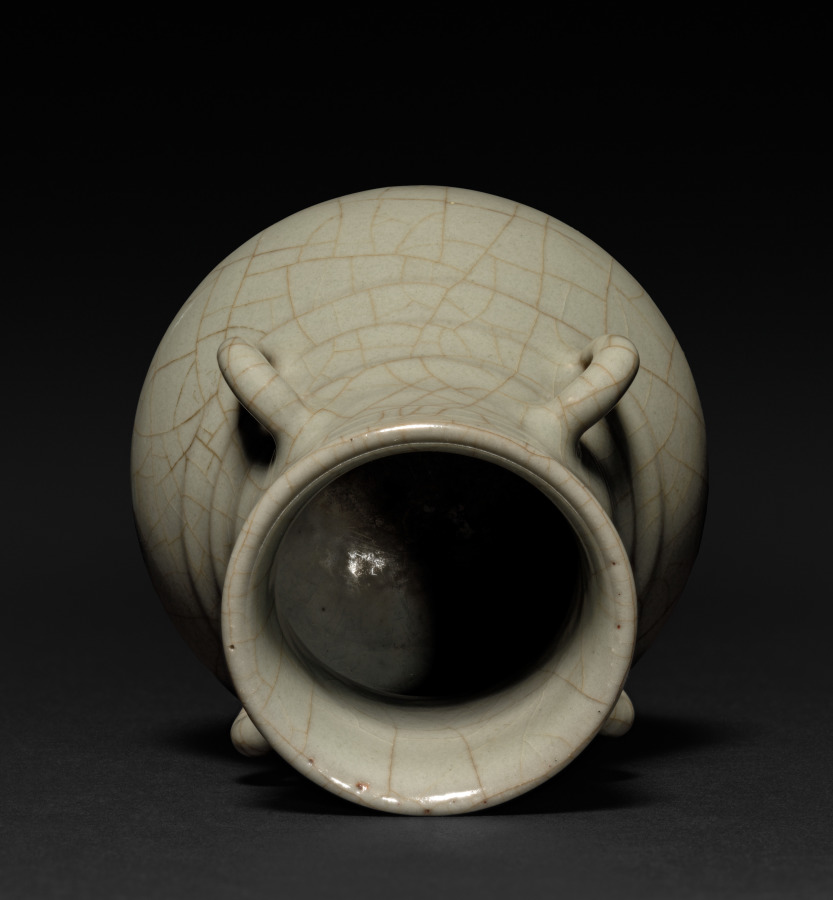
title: Vase: Guan type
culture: China, Qing dynasty (1644-1911)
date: 1700s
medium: porcelain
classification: Ceramic